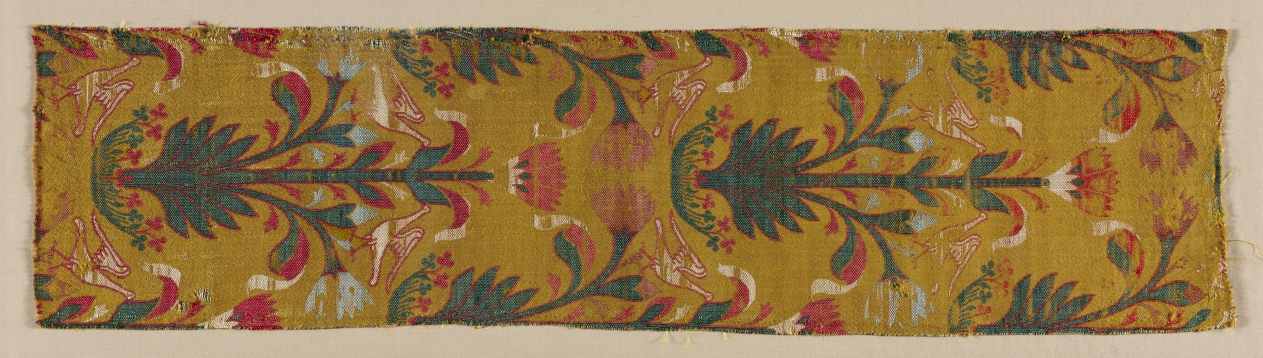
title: Silk Fragment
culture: Spain, Mudejar, 15th century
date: 15th century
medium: lampas weave, silk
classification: Textile